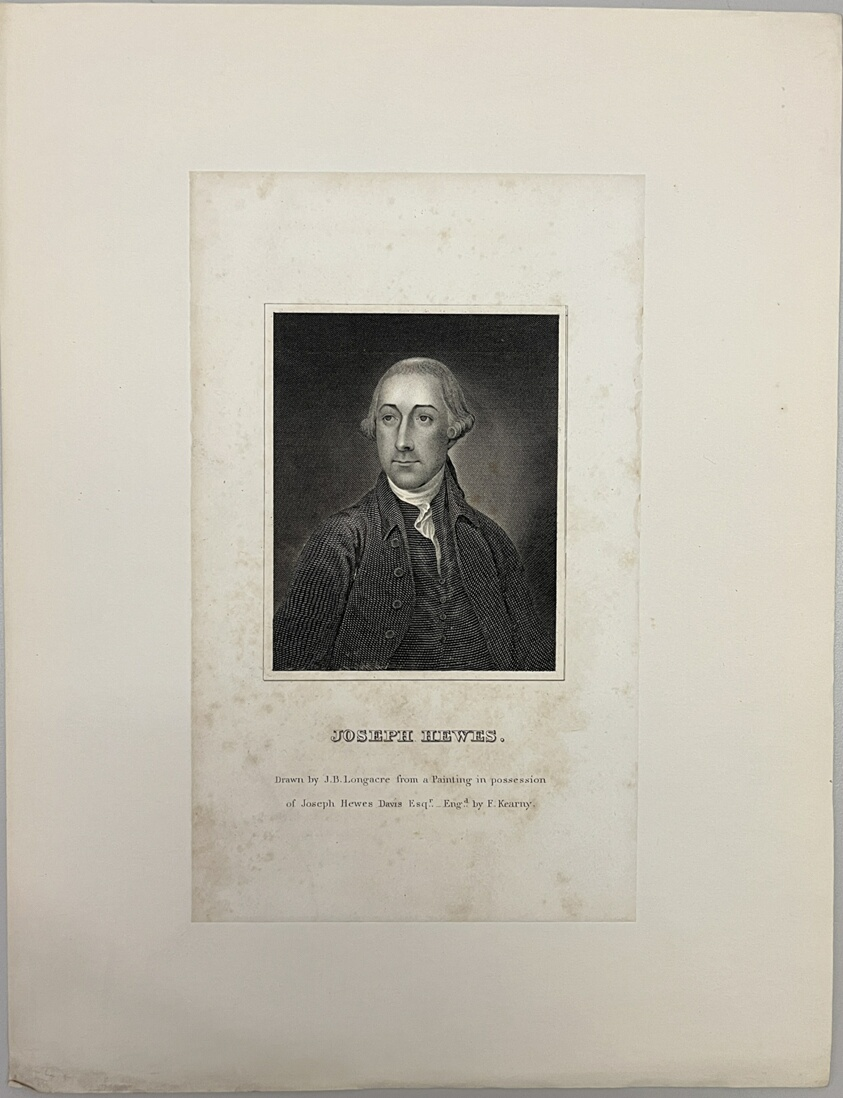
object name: Print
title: Joseph Hewes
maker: Francis Kearny (American, died 1837); after James Barton Longacre (American, 1794-1869)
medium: Steel engraving on paper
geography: United States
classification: reproduction; print; prints and drawing